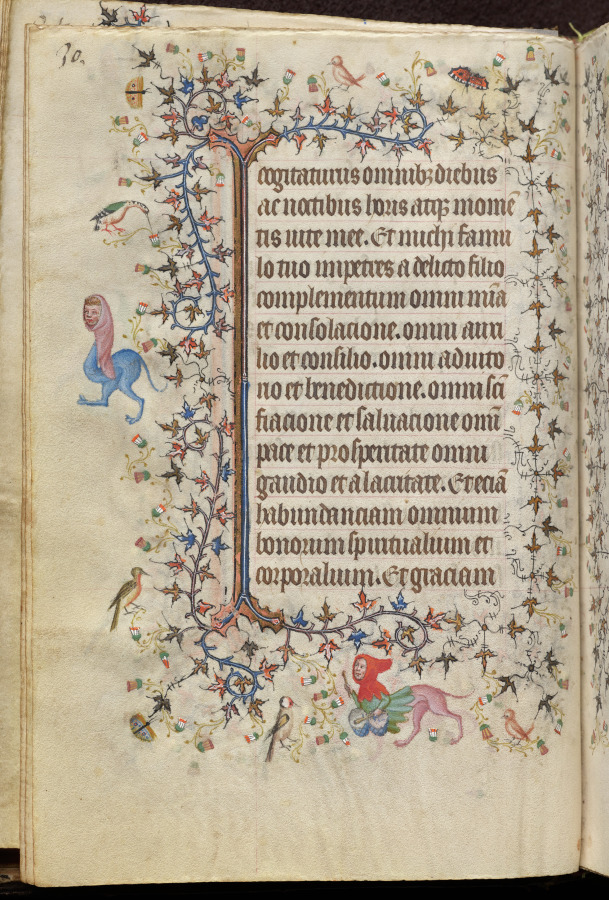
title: Hours of Charles the Noble, King of Navarre (1361-1425): fol. 15v, Text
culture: France, Paris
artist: Master of the Brussels Initials and Associates (French)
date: c. 1405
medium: ink, tempera, and gold on vellum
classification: Bound Volume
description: This precious volume was obviously highly prized by its owner, the French-born King of Navarre, who had his coat of arms painted on no less than twenty folios. Rather than directly commissioning this manuscript from a specific workshop, it seems that Charles the Noble acquired his book of hours -- perhaps ready-made for the luxury market -- while on a trip to Paris in 1404-05. A collaborative effort, six painting styles are evidenced within the pages of this codex, those of two Italians, two Frenchmen, and two Netherlanders. The painter who was responsible for the planning and decoration of the book, and who produced seventeen of the large miniatures, was a Bolognese artist known as the Master of the Brussels Initials. His principal assistant, responsible for most of the borders, was a Florentine who signed his name "Zecho" da Firenze on folio 208 verso.